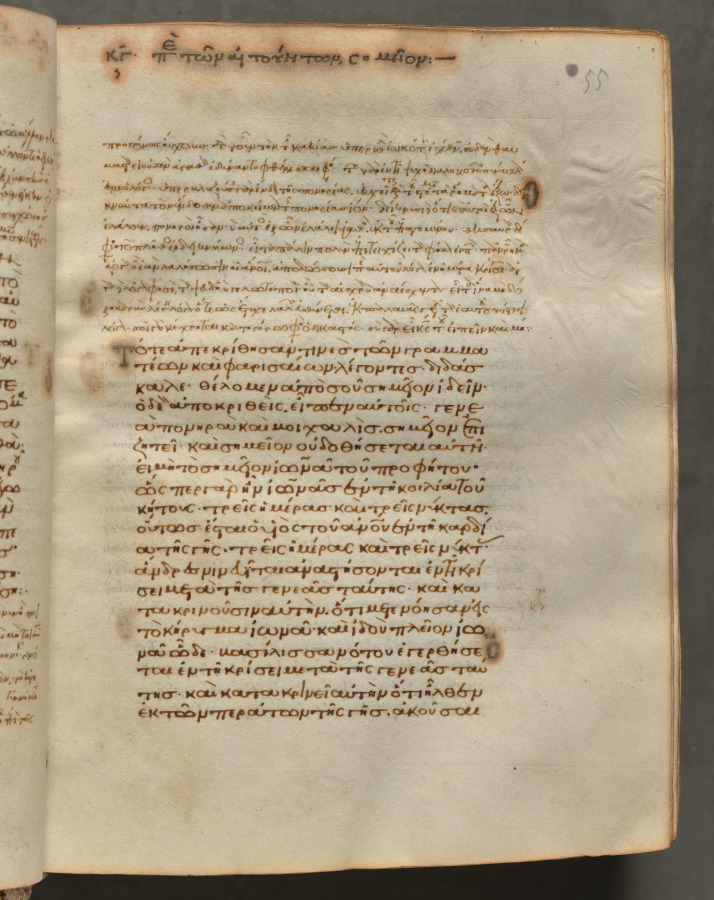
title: Text, folio 55 (recto), from a Gospel Book with Commentaries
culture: Byzantium, Constantinople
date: c. 1000–1100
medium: ink, tempera, and gold on vellum; leather binding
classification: Bound Volume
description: Each of the four gospels in this book opens on a page with brilliantly illuminated borders depicting the author of the text as well as birds-principally peacocks, symbols of the immortality of the soul-and fountains, representing the fountain of life and the salvation of the soul. This volume consists of 428 leaves with texts in Greek. Its level of sophistication suggests that it was probably written and decorated in a monastery in Constantinople.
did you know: Gospel Books were carried in procession through Byzantine churches.